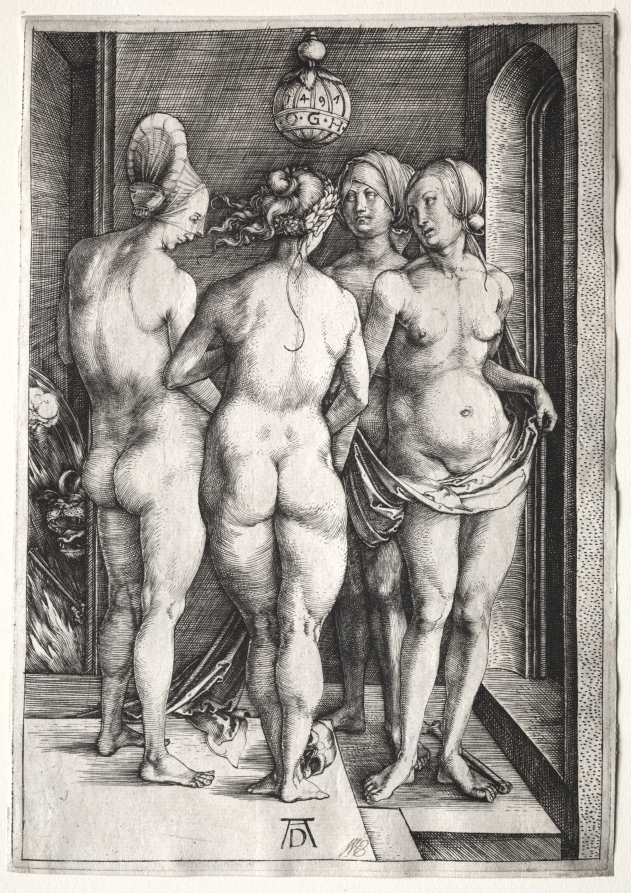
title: The Four Witches (Four Naked Women)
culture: Germany, late 15th Century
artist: Albrecht Dürer (German, 1471–1528)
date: 1497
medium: engraving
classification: Print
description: Dating from early in Albrecht Dürer’s career, this engraving cannot be tied to a specific narrative but may allude to the Greek goddess of the underworld, Hecate. Four nude women gather under an orb with a skull at their feet, while a ghoul emerges to their left. Three of the women could represent Hecate, who was often depicted with three faces or bodies; the fourth may be Diana, Hecate’s counterpart on earth. The nudity and allusions to black magic suggest mischief and the realm of witches. Prints offered a new medium for exploring subject matter that was deemed inappropriate in other media, such as painting.